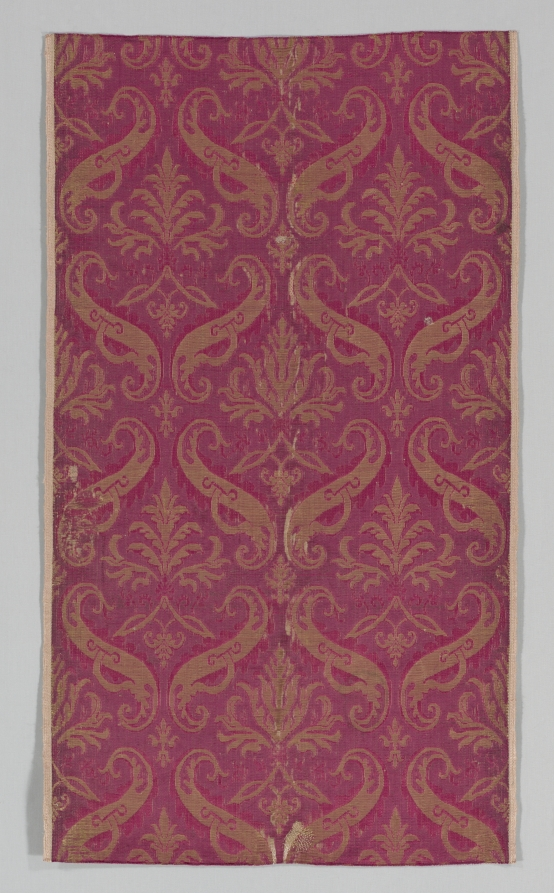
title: Length of Textile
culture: Italy or Spain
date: 1500s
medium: brocade; silk, linen, and metal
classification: Textile